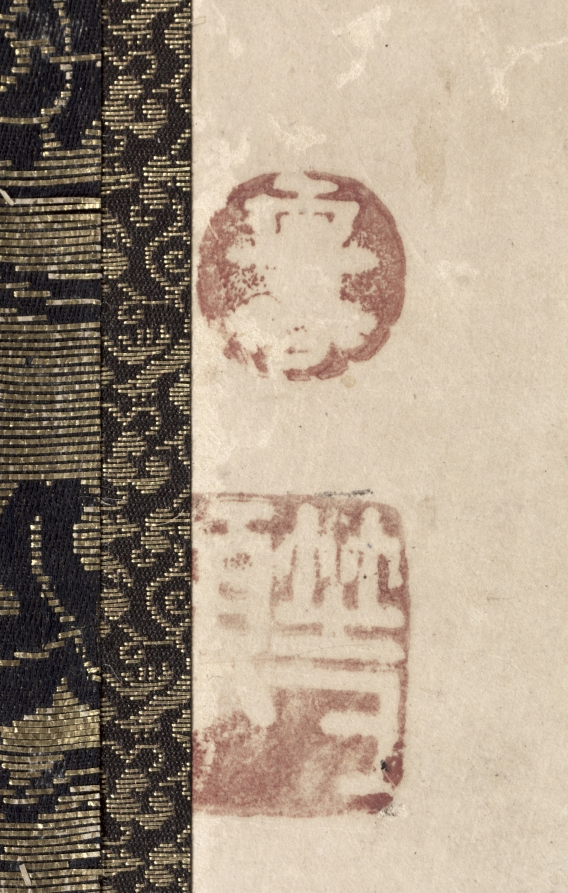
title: Pan Lang (Han Rō)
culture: Japan, Momoyama period (1573–1615)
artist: Unkoku Tōgan (Japanese, 1547–1618)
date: early 1600s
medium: one of a pair of six-panel folding screens; ink, light color, and gold on paper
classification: Painting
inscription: Each screen in the pair is impressed with two seals arranged vertically, a round "Unkoku" seal above and square "Togan" seal below.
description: This is one of the pair of screens depicts episodes from the stories of famed Song-dynasty poets Su Shi of the 1000s and Zhou-dynasty official Pan Lang of the 900s. Both men were banished by their rulers for their perceived missteps. Su Shi’s comments on a series of economic reforms were seen as criticism of the emperor. Pan Lang composed an ill-advised verse about one of the king’s horses. In this screen Pan rides backward on his donkey as he returns from exile so that he may have a last look at his now beloved Mount Hua. Su Shi, on the other screen, is shown embarking on his journey into exile. The artist of these screens, Unkoku Tōgan, was the founder of the Unkoku school of painting, which emulated the style of renowned ink painter Sesshū Tōyō (1420–1506). Tōgan was the official painter of the Mori family of what is now Yamaguchi prefecture in the south of Japan.